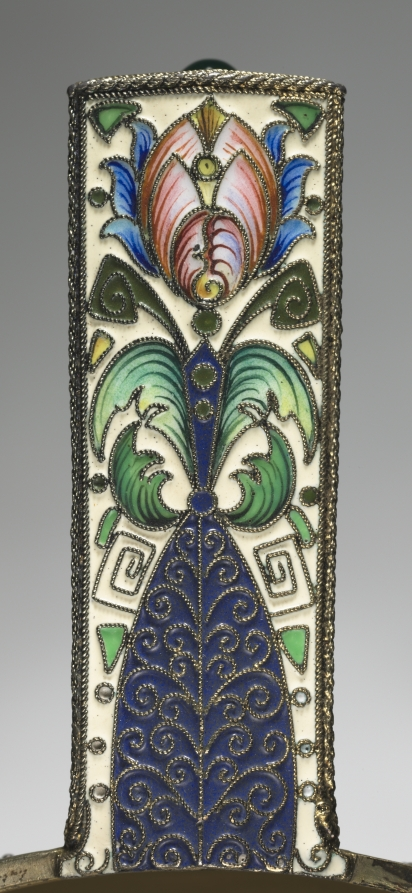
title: Kovsh (Cup)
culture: Russia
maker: House of Fabergé (Russian, 1842–1918)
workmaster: Feodor Ivanovich Rückert (Russian, 1840–1917)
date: 1896–1906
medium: silver gilt, enamel, cabochon gems, chrysoprases, carnelians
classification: Miscellaneous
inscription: inscribed on bottom: "CH" in script monogram (owner's initials).